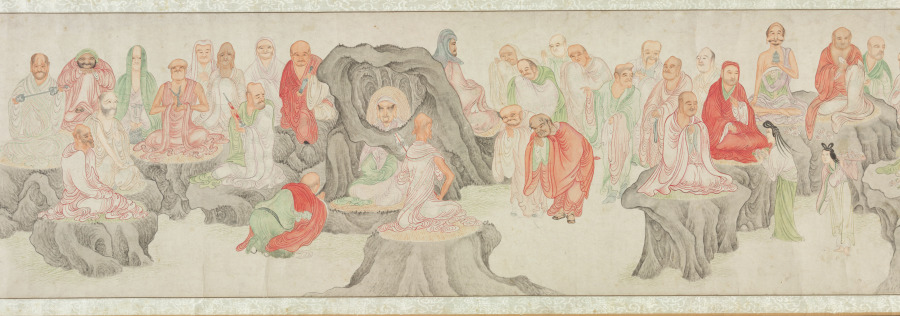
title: The Five Hundred Arhats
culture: China, Ming dynasty (1368–1644)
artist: Wu Bin (Chinese, active c. 1591–1626)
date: 1591–1626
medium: Handscroll; ink and color on paper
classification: Painting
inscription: 枝隱頭陀吳彬齋心拜寫 [印]吳彬之印; 文中父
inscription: 7 seals of Qianlong emperor (r. 1736–95): Gu xi tian zi 古希天子; Shou 壽; Qianlong jian shang 乾隆鑑賞; San xi tang jing jian xi 三希堂精鑑璽; Yi zi sun 宜子孫; Tai shang huang di zhi bao 太上皇帝之寳; Qian qing gong bao 乾清宮寶.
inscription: 6 seals of Cheng Qi 程琦 (1911–1988): Ke an geng zi wu shi yi hou suo de ming ji 可菴庚子五十以後所得名跡; 5 other Cheng Qi seals.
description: More than 66 feet long, this handscroll depicts 447 luohans, 72 attendants, and the bodhisattva of compassion at its very end. Luohans (arhats in Sanskrit), disciples of the Buddha and protectors of the Buddha’s law, possess supernatural powers and take on myriad external appearances. The amusing assortment of characters are engaged in an array of religious, secular, and miraculous activities. The painter used stylistic features borrowed from earlier artists, carefully controlled lines, and refined coloring. Wu Bin was a lay Buddhist and depicting this sort of image was part of a religious practice seeking understanding of the Buddha’s teaching.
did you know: Far advanced on the path to enlightenment, arhats have the capacity to tame tigers, free dragons, and to float on water or in the air.